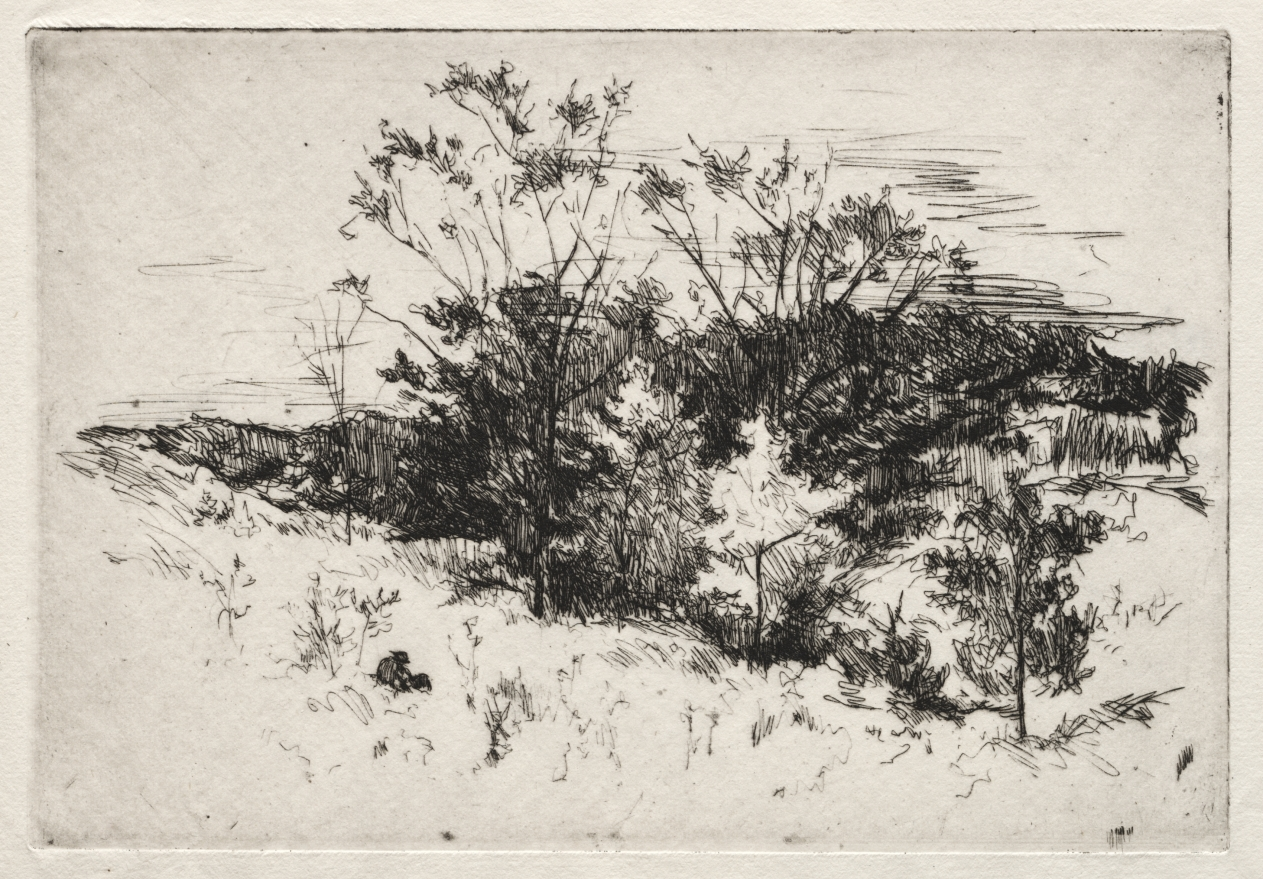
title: Autumn Landscape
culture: America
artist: John Henry Twachtman (American, 1853–1902)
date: 1879–80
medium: etching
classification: Print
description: The spontaneous, sketchlike quality of this landscape suggests that Twachtman drew en plein air directly onto prepared copper plates. The almost bare limbs of the trees at the center evoke the transition from autumn to winter. Balancing the composition in the lower left is a small figure, possibly the artist, almost hidden in the grass.